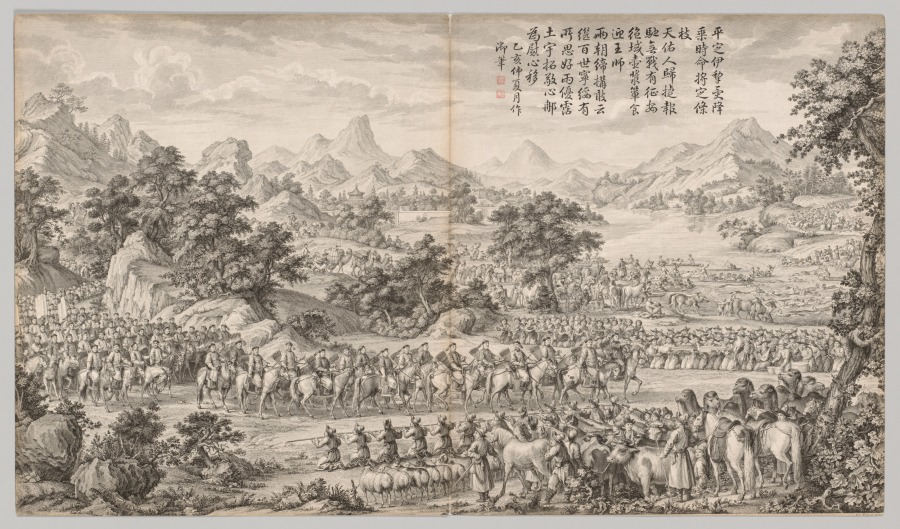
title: Receiving Surrender from the Eli: from Battle Scenes of the Quelling of Rebellions in the Western Regions, with Imperial Poems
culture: China, Qing dynasty (1644–1911), Qianlong reign (1736–95)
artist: Giuseppe Castiglione (Italian, 1688–1766)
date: c. 1765–74; poem dated 1755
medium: etching, mounted in album form, 16 leaves plus two additional leaves of inscriptions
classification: Print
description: This set of etchings was commissioned by Emperor Qianlong to record in pictorial terms the courage of his generals and soldiers in quelling the rebellions in the Western Regions. Qianlong added his own poem to each of the etchings, indicating his appreciation and pride in this demonstration of military might. "Western Regions" refers to the present-day Xingjiang province, often described in Western writing as "Central Asia."